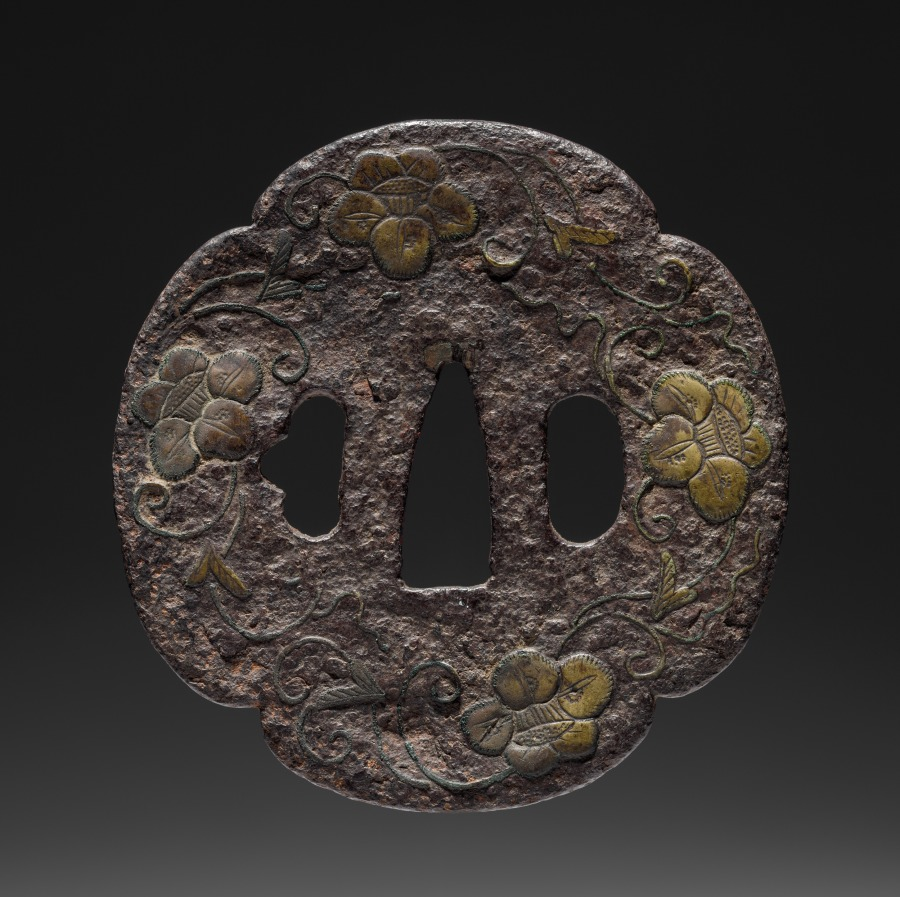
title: Sword Guard (Tsuba) with Camellia (Tsubaki)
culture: Japan, possibly Edo period (1615-1868)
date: c. 1615–1868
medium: iron with brass inlay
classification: Arms and Armor